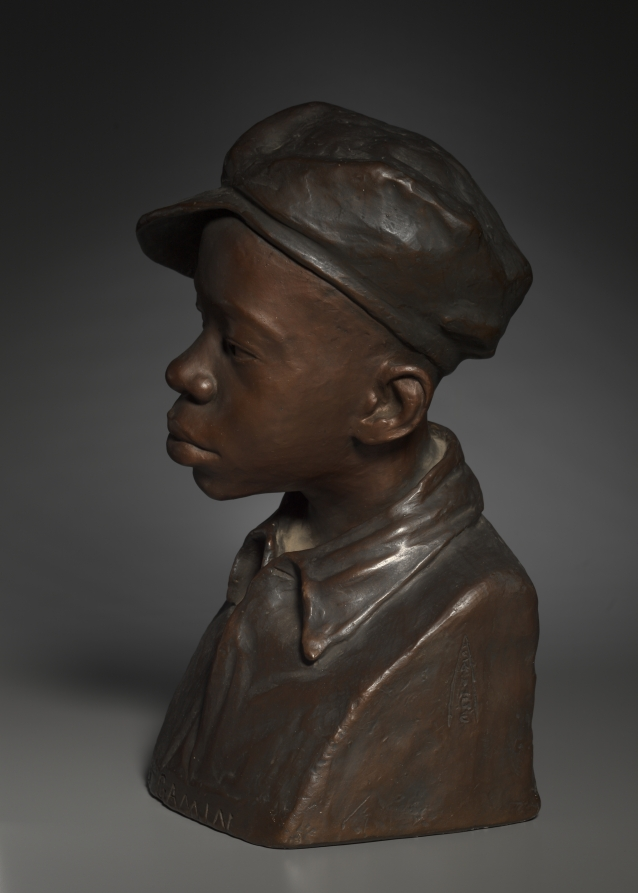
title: Gamin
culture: America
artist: Augusta Savage (American, 1892–1962)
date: c. 1929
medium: hand-painted plaster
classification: Sculpture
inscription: signed on right-side: "Savage"; titled across the bottom-front: "Gamin"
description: Augusta Savage was the most acclaimed sculptor working during the Harlem Renaissance of the 1920s and ‘30s, and Gamin is her most famous work. It was long thought that the image was a generic figure; however, recent research reveals that it depicts her nephew. The warm characterization likely arises from the close bond shared between artist and model. Although several small versions of the sculpture were produced, this life-size, hand-painted plaster is unique, and likely the oldest surviving example of the subject.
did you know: A trailblazer, Savage was the first African American member of the National Association of Women Artists.